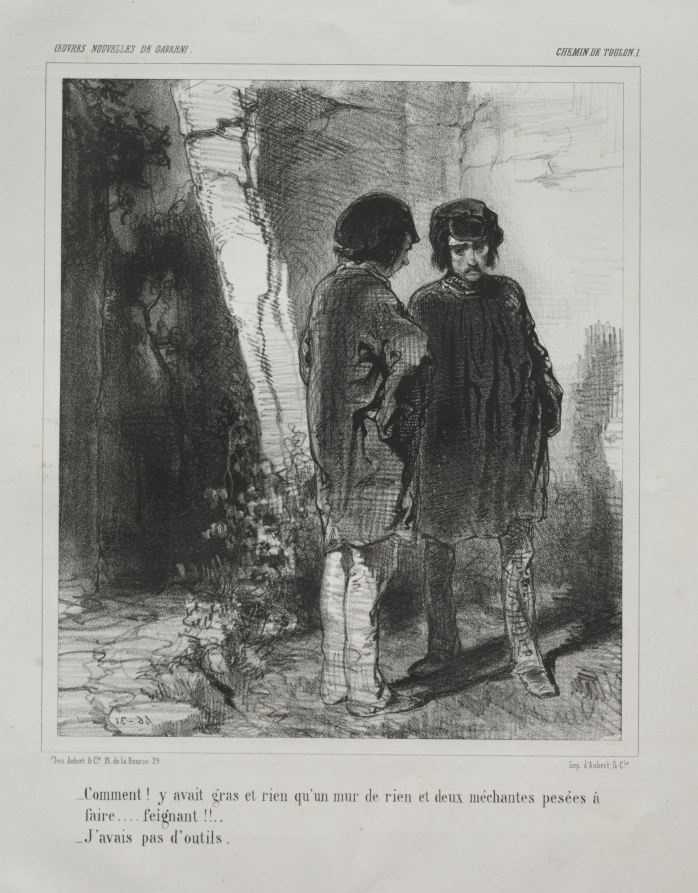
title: Chemin de Toulon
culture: France, 19th century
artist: Paul Gavarni (French, 1804–1866)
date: c. 1846–47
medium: lithograph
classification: Print